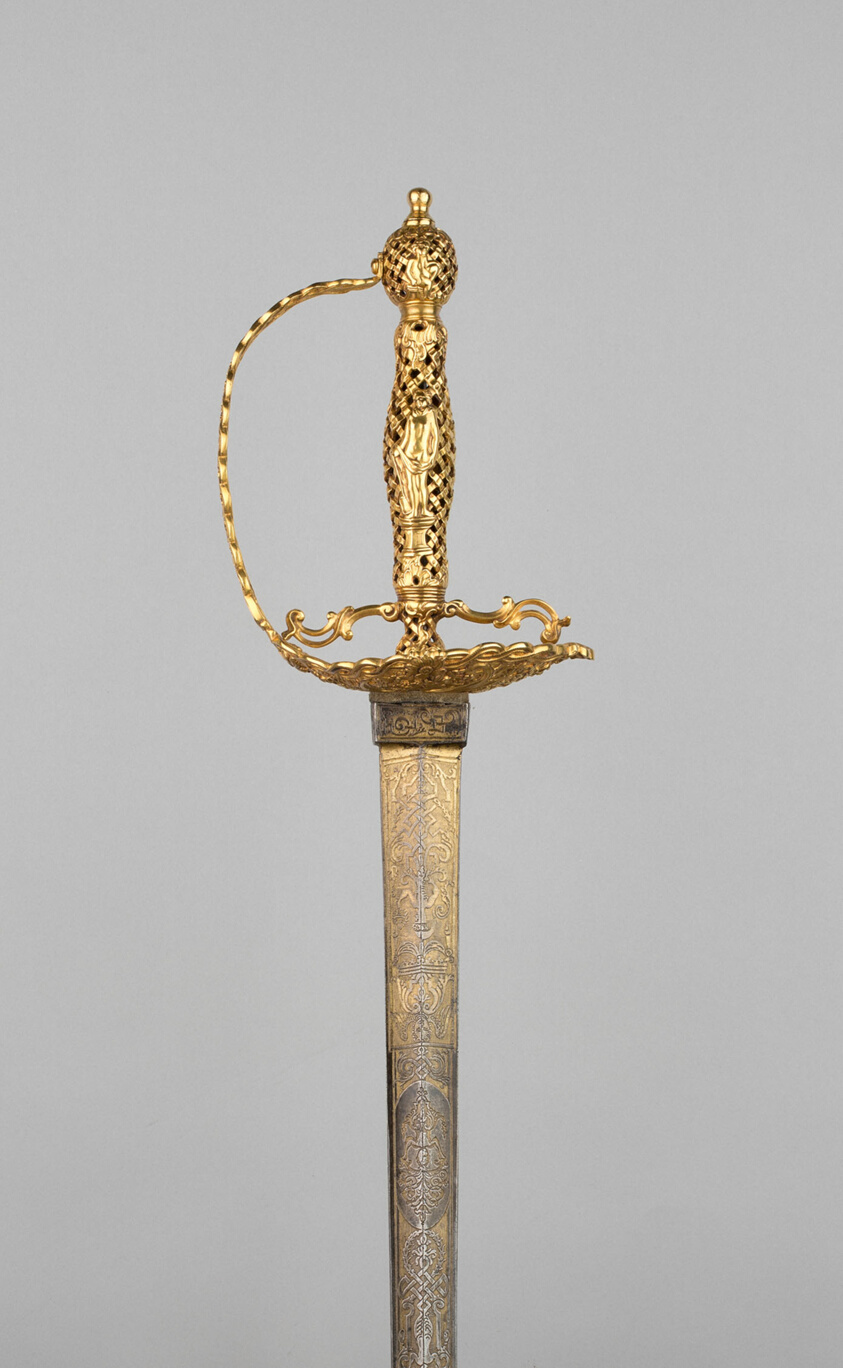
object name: Arms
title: Dress Sword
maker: Hilt: Portuguese or Spanish; blade: probably German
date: 1743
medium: Gold-Copper alloy, steel, and gilding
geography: Spain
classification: edged weapon-sword; arms; arms and armor